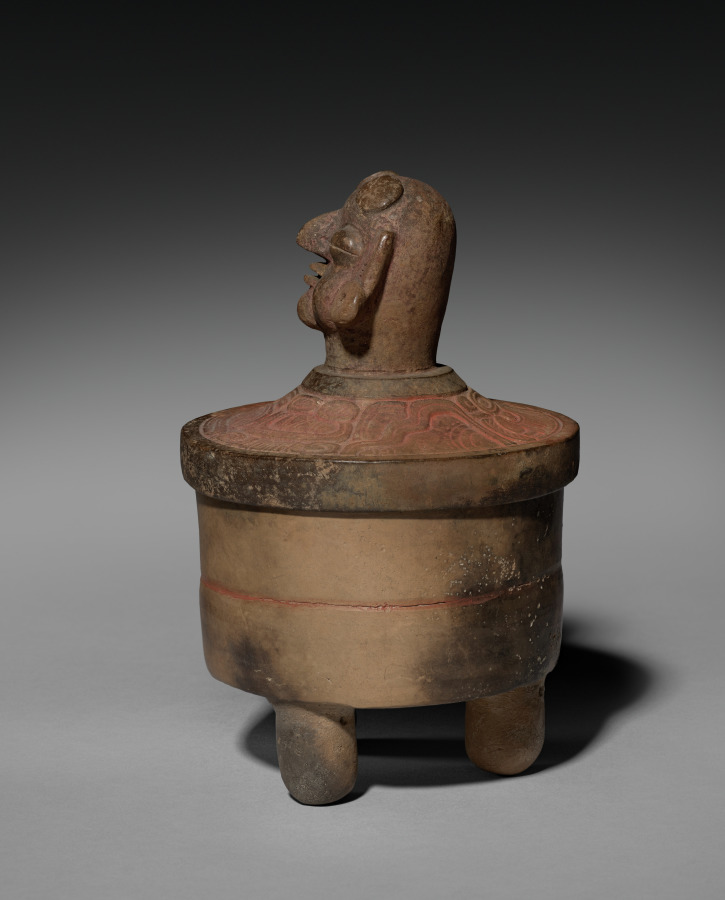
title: Tripod Vessel with Lid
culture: Mexico or Central America, Maya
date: 250–600 CE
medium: earthenware with pigment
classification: Ceramic